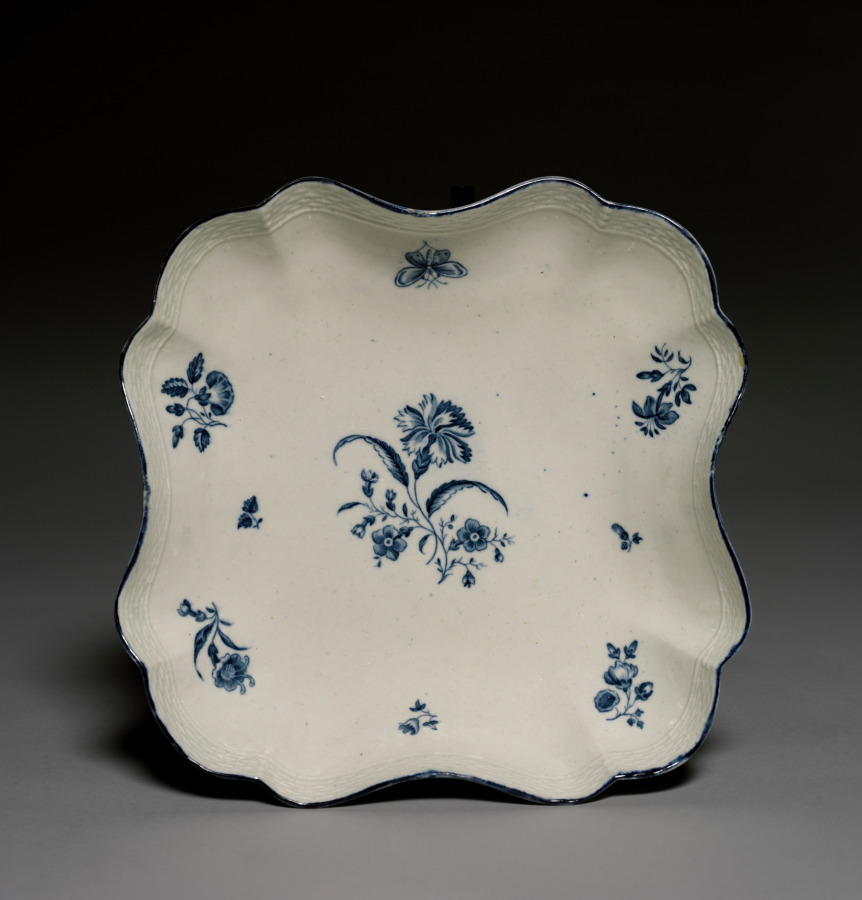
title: Square Dish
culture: England, 19th century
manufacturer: Worcester Porcelain Factory (British, established 1751)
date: c. 1773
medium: porcelain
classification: Ceramic